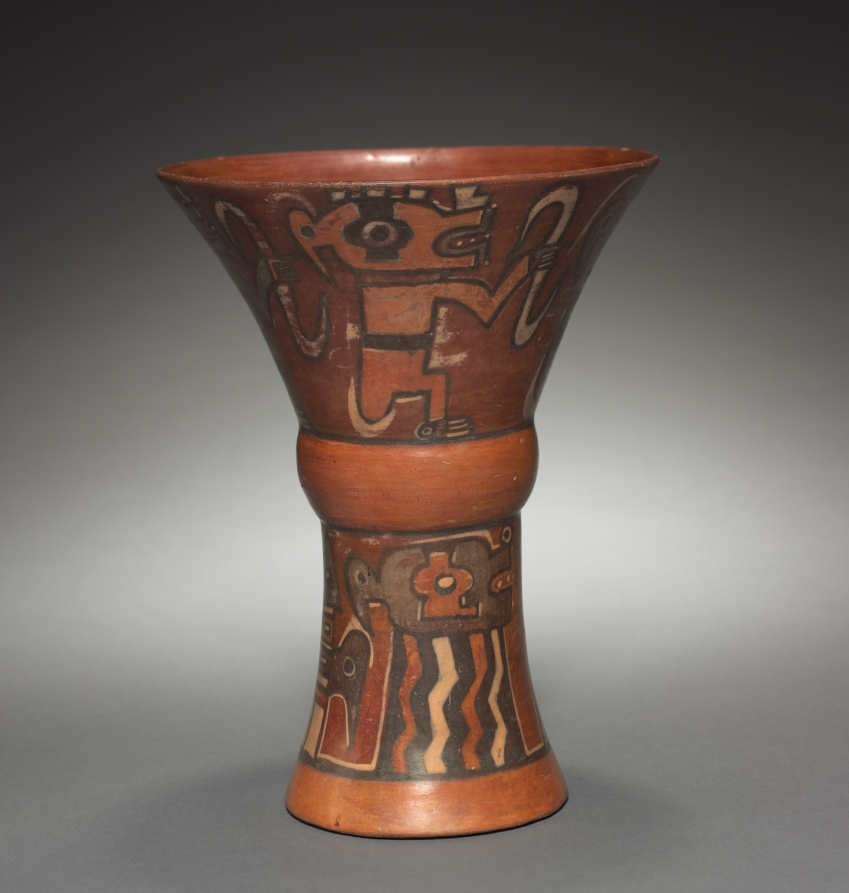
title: Kero (Waisted Cup)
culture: Bolivia, Cochabamba(?), Tiwanaku style, 400-1000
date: 400–1000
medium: earthenware with colored slips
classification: Ceramic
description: The kero is a distinctive Tiwanaku vessel form, imitated by the later Inka, who used the cups in political and religious ceremonies. It is assumed that the same was true at Tiwanaku, where impressive stone figures, perhaps rulers, hold keros as though they are emblems of authority. Perhaps, like the Inka, the Tiwanaku used keros to drink chicha, a corn beer shared to cement bonds of mutual obligation among allies.